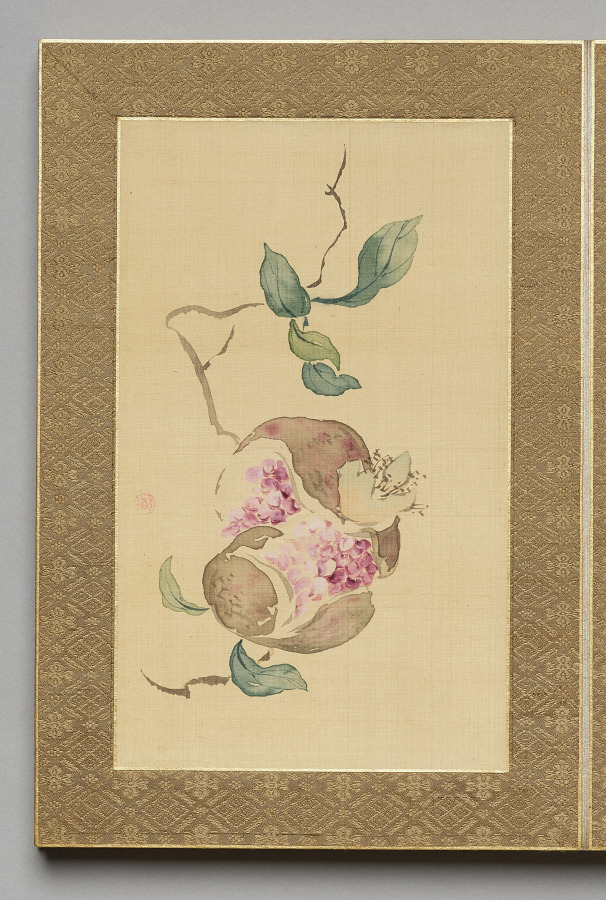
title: Painting from Flowers and Grasses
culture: Japan, Edo period (1615–1868)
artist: Tsubaki Chinzan (Japanese, 1801–1854)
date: 1841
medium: album; ink and color on silk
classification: Painting